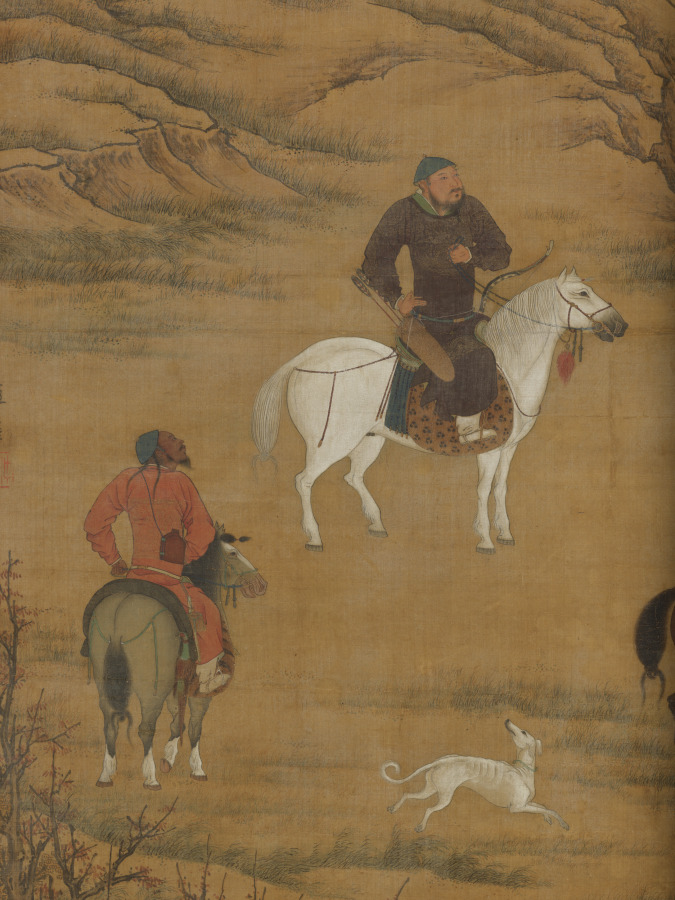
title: Hunting on Horses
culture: China, Ming dynasty (1368-1644) - Qing dynasty (1644-1911)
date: c. 1600s–1700s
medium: Hanging scroll; ink and color on silk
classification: Painting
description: This large-scale hanging scroll depicts a party hunting for waterfowl along a riverbank in the springtime. The leader is distinguished from the other five mounted hunters by his purple robe with golden dragon patterns and his white horse with a red tassel. He and his horse maintain still, dignified postures as a small white falcon captures one of the wild geese. Equestrian pursuits and hunting were particularly popular among the Khitan (also spelled “Qidan”) and Jurchen, ethnic groups who lived along China’s northeastern border. Their nomadic lifestyle intrigued the Chinese court and inspired Chinese artists to develop a painting genre showing them hunting.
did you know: This falconry scene includes one white hunting dog and four trained hunting birds.